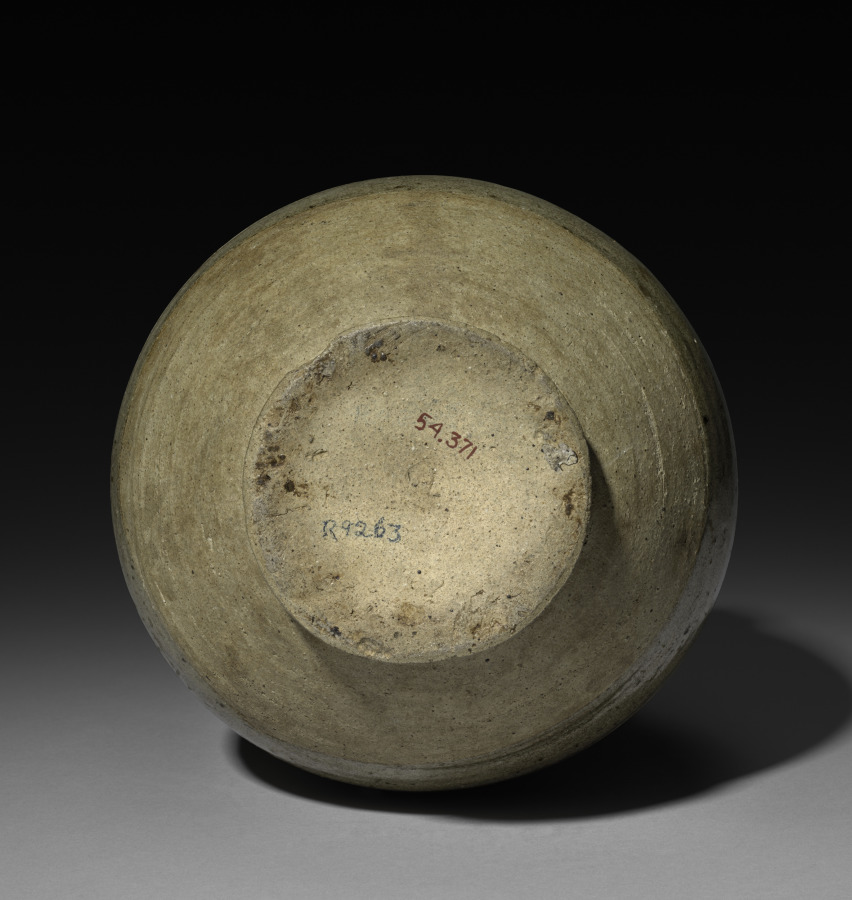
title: Jar with Four Loop-Handles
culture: China, Sui dynasty (581-618) - Tang dynasty (618-907)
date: 500s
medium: glazed gray stoneware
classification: Ceramic